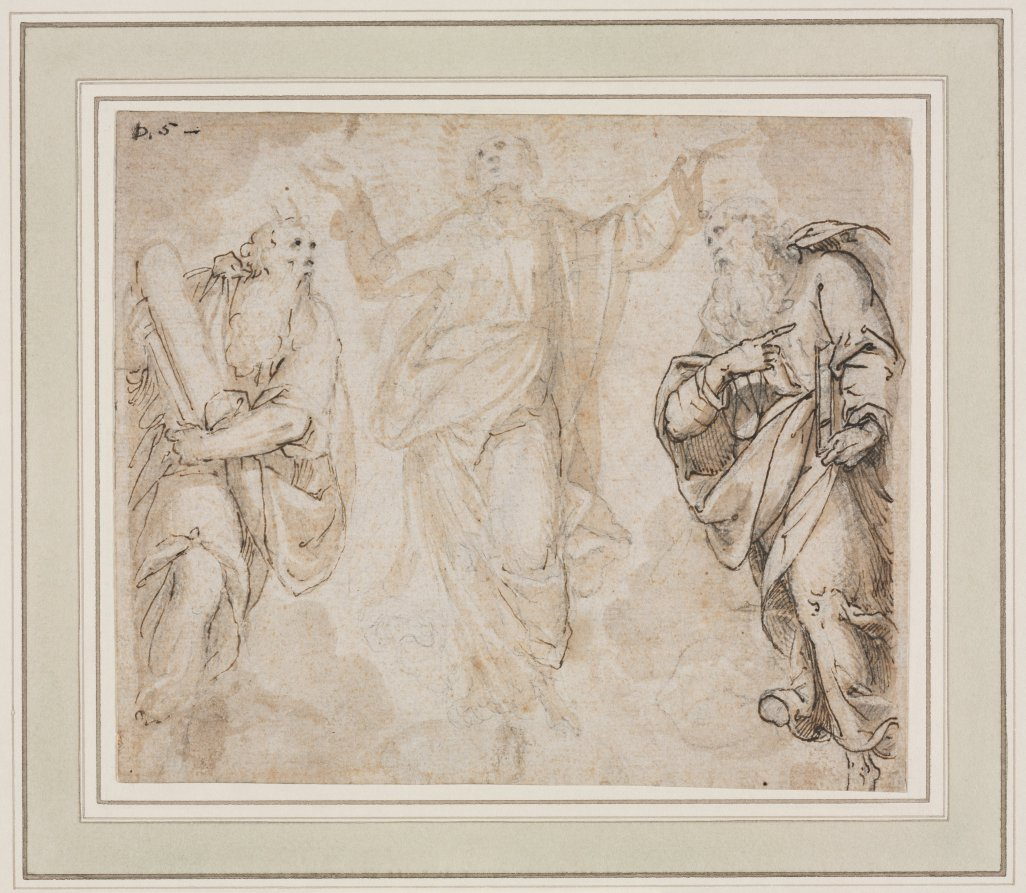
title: The Transfiguration (recto)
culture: Italy, 16th century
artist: Camillo Procaccini (Italian, 1546–1629)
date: c. 1590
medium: pen and brown ink and graphite and brush and brown wash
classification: Drawing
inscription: upper left, in brown ink: D. 5 -